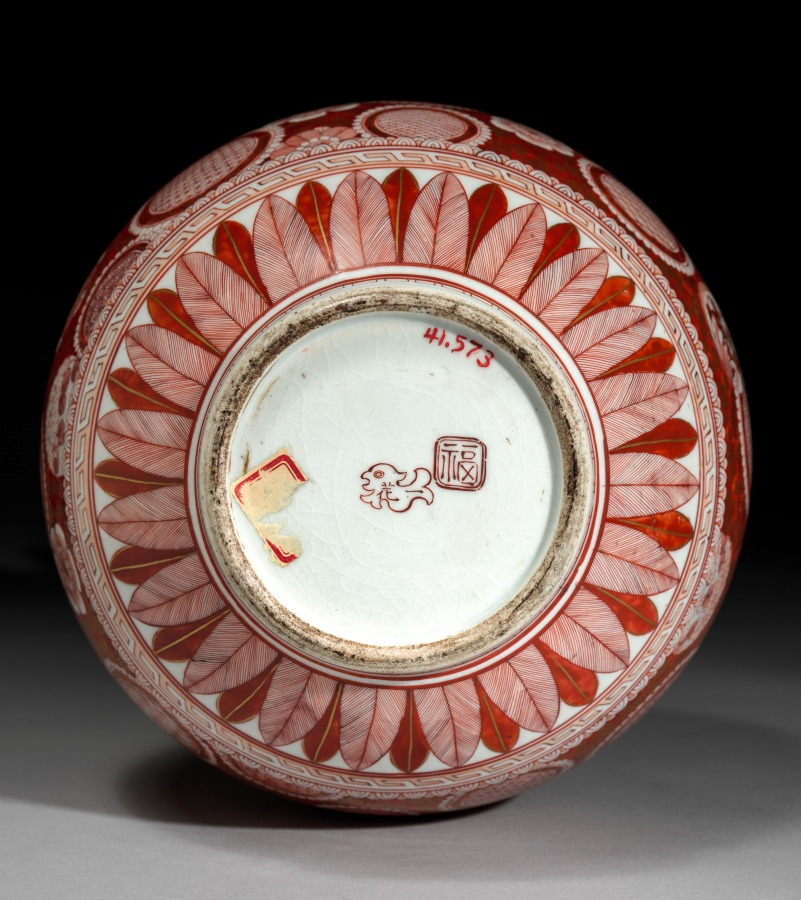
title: Vase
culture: Japan, Edo period (1615–1868)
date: early to mid-1800s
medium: porcelain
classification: Ceramic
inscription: on the base in red are "FUKU" (happiness) in a square and "ICHI-KA" in a fish.